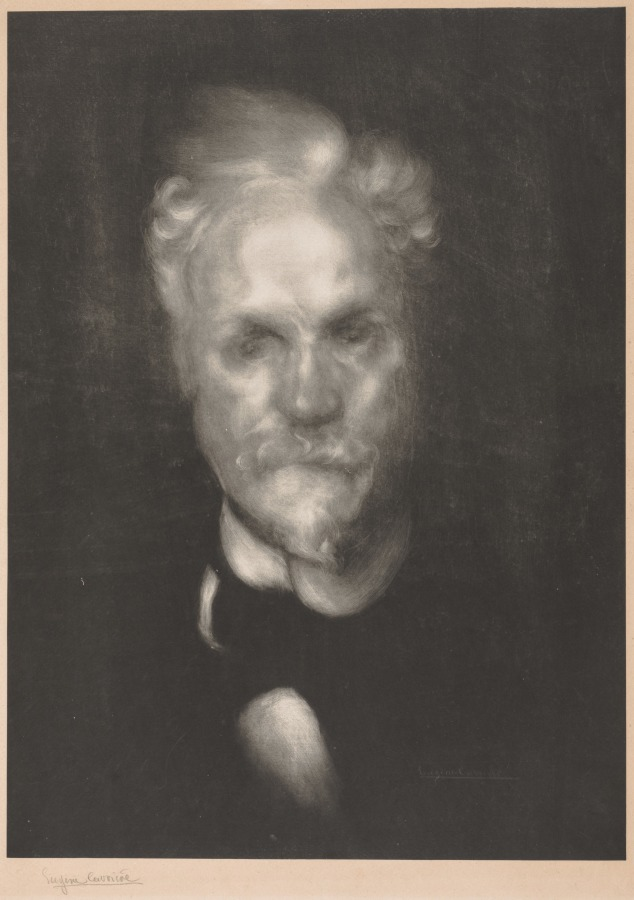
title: Henri Rochefort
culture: France, 19th century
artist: Eugène Carrière (French, 1849–1906)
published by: Lemercier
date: 1896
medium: lithograph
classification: Print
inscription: signed, lower left, in graphite: Eugène Carrière; signed lower right, in stone: Eugène Carrière